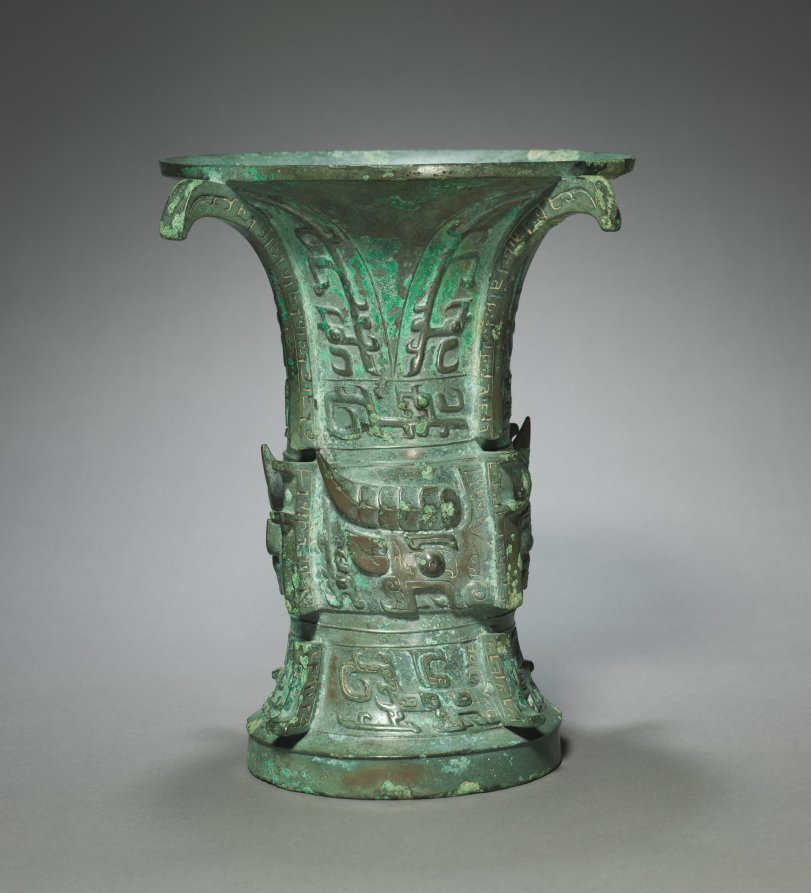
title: Wine Vessel (Zun)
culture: China, Western Zhou dynasty (c. 1046–771 BCE)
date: c. 1000 BCE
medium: bronze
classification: Metalwork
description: Although the Zhou defeated the Shang, the performance of religious rites and the casting of ceremonial bronzes continued. Zhou bronze art, nevertheless, reveals the artistic sentiments of a new era. There was as much confidence in the achievements of the living as observance of ritual duties for the dead. For example, this wine vessel combines artistic imagination with a display of strength and force. Bold images of buffalo heads with protruding horns were cast onto the middle section. Together with the four notched flanges extending downward below the flaring mouth, there is an effect of overflowing energy.